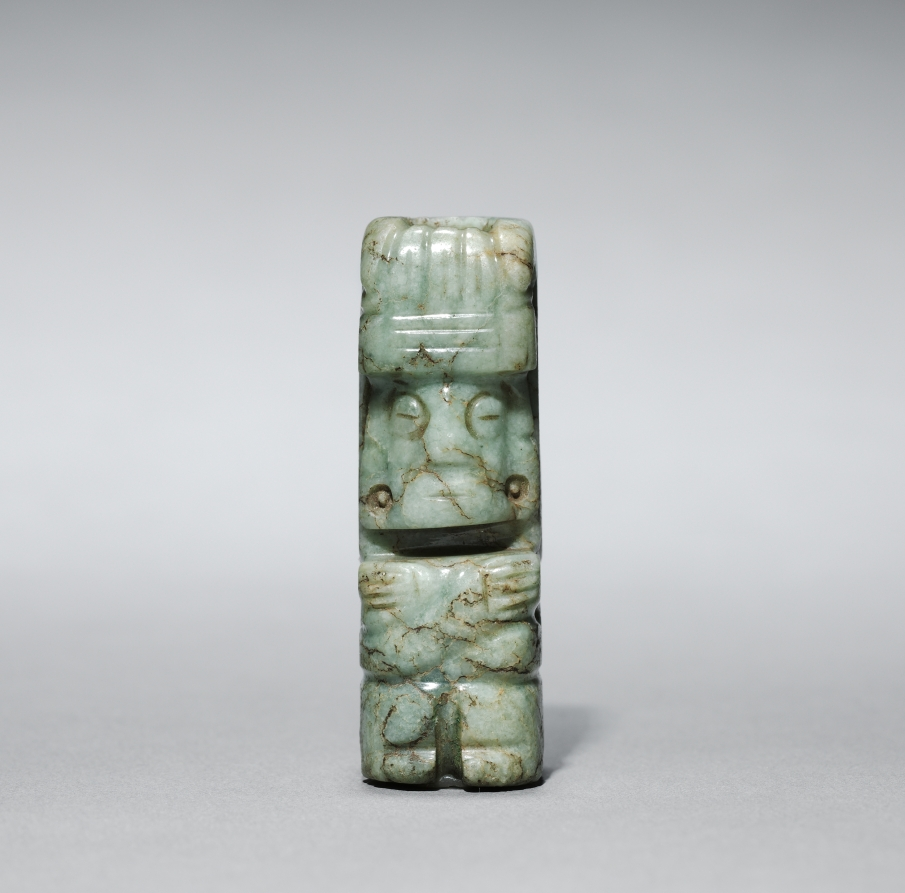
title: Figurine Pendant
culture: Mexico, Oaxaca, Mixtec style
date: c. 1200–1519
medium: jade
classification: Jade